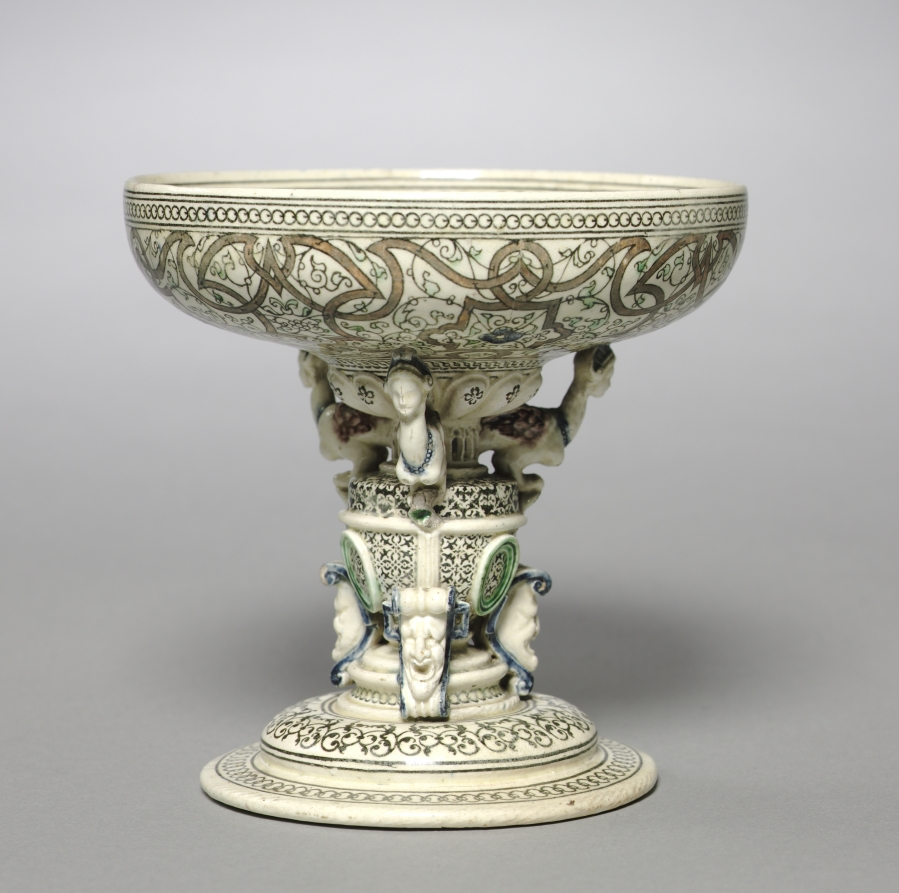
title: Standing Cup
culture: France, 16th century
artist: Saint-Porchaire (French)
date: c. 1540–60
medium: lead-glazed, white-paste earthenware with inlaid slip decoration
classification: Ceramic